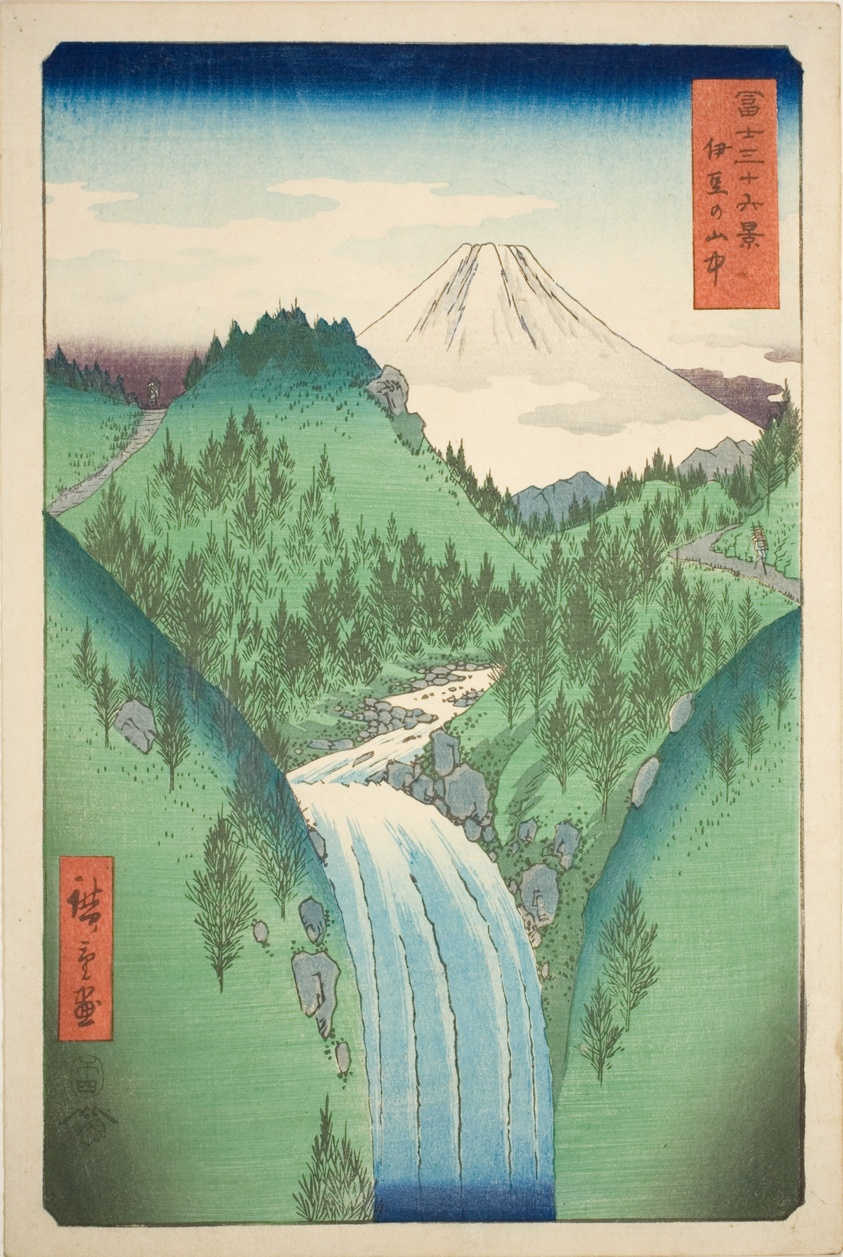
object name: Print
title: In the Mountains of Izu Province (Izu no sanchu), from the series "Thirty-six Views of Mount Fuji (Fuji sanjurokkei)"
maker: Utagawa Hiroshige 歌川 広重; Japanese, 1797-1858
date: 1858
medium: Color woodblock print; oban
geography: Japan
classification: woodblock print; print; asian art